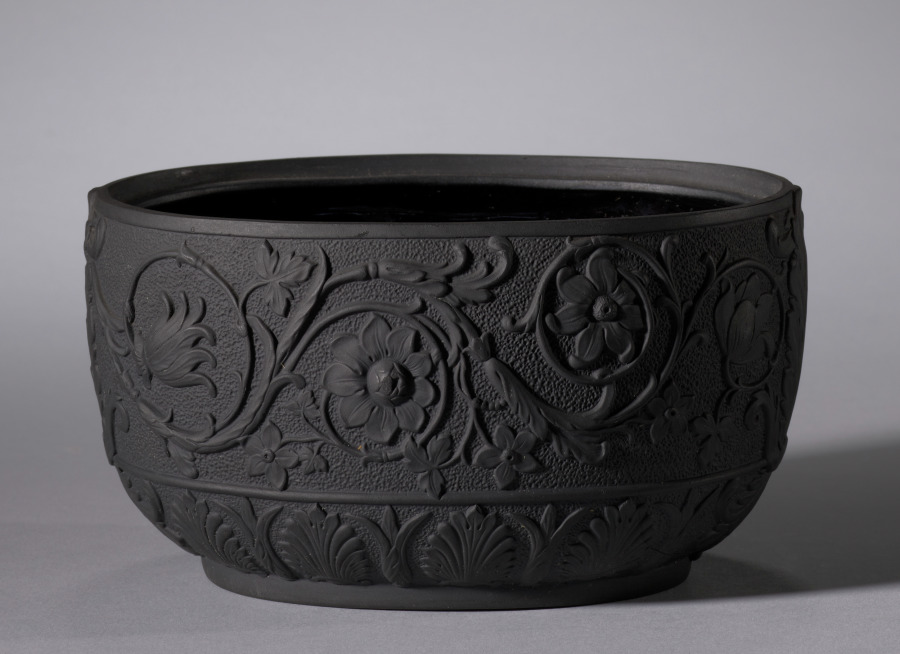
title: Teapot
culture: England, 19th century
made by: Elijah Mayer (British, c. 1770–1805)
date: c. 1810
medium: black basalt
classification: Ceramic